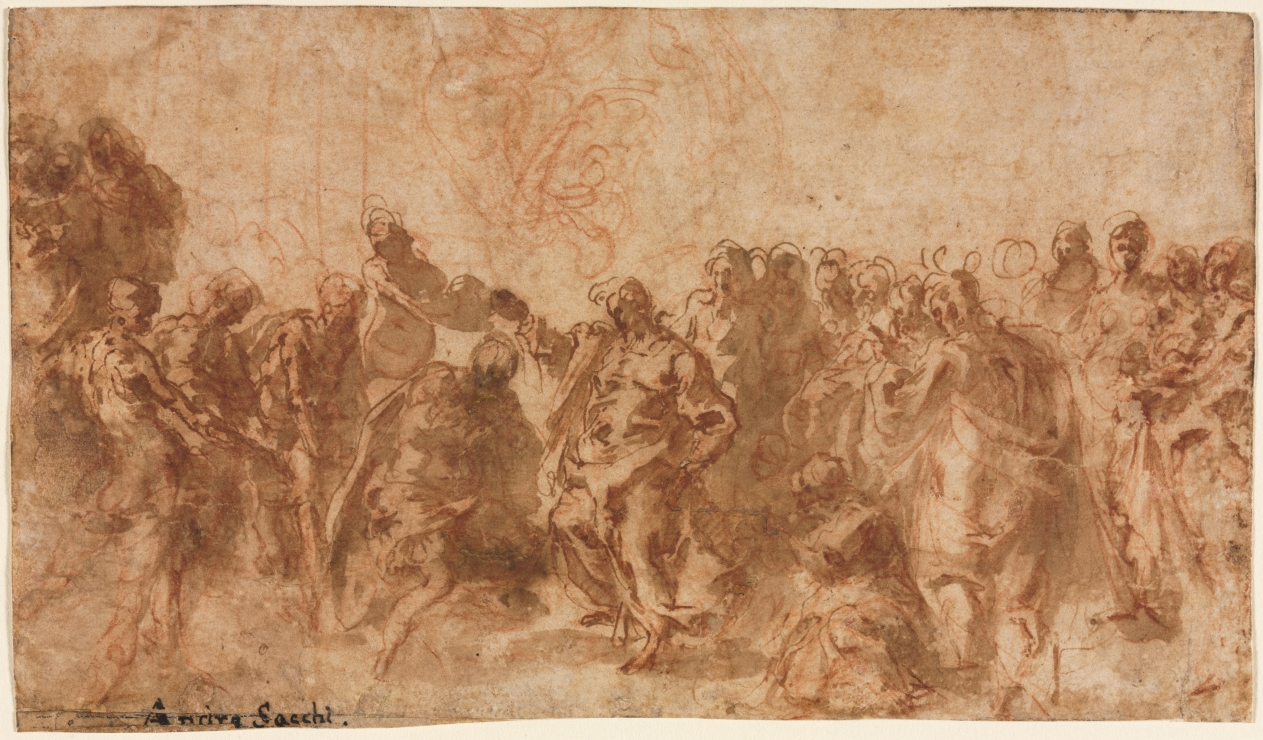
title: The Baptism of Christ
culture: Italy, 17th century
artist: Cesare Pollini (Italian, c. 1560-c. 1630)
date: c. 1600–1630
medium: pen and brown ink and brush and brown wash and red chalk; traces of framing lines in black chalk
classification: Drawing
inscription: lower left, in brown ink: Andr[e?] Sacchi .